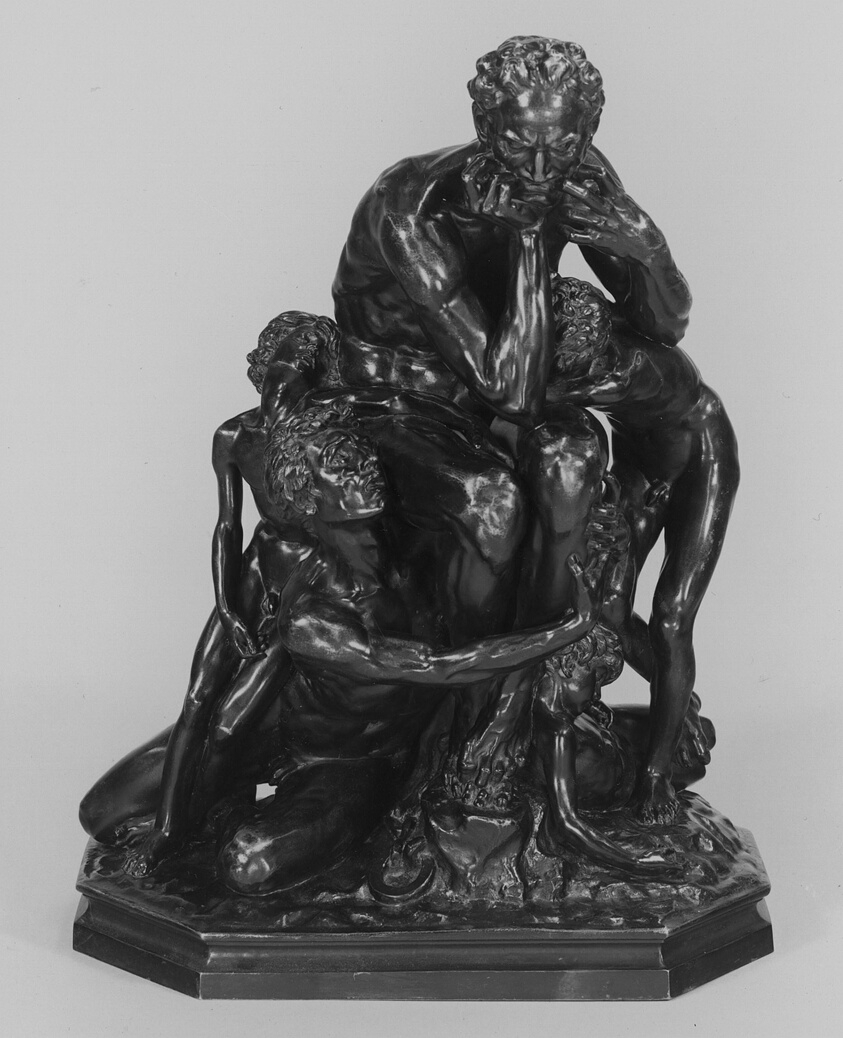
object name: Sculpture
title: Ugolino and his Children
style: nineteenth century, 19th century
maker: Jean Baptiste Carpeaux (French, 1827–1875)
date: 1863/65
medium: Bronze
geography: France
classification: statuette; french; sculpture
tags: fathers, sculpture, prisoners, prison, nudes, man, families, death, children, bronze (color), boys